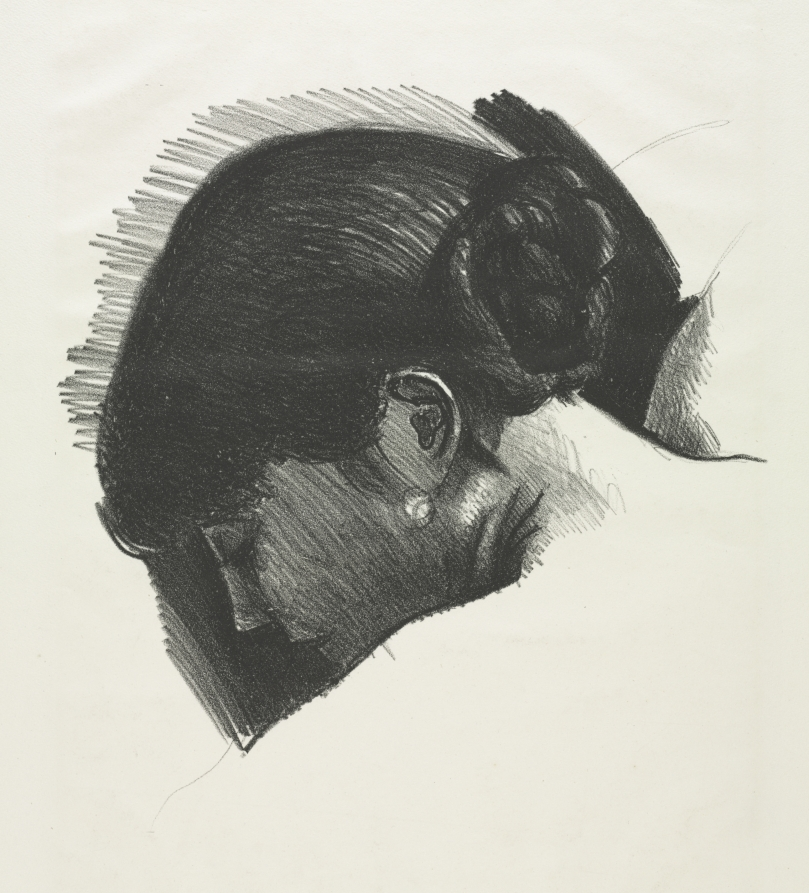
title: Study No. 4: Waiting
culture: England, 20th century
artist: John Copley (British, 1875–1950)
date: 1924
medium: lithograph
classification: Print